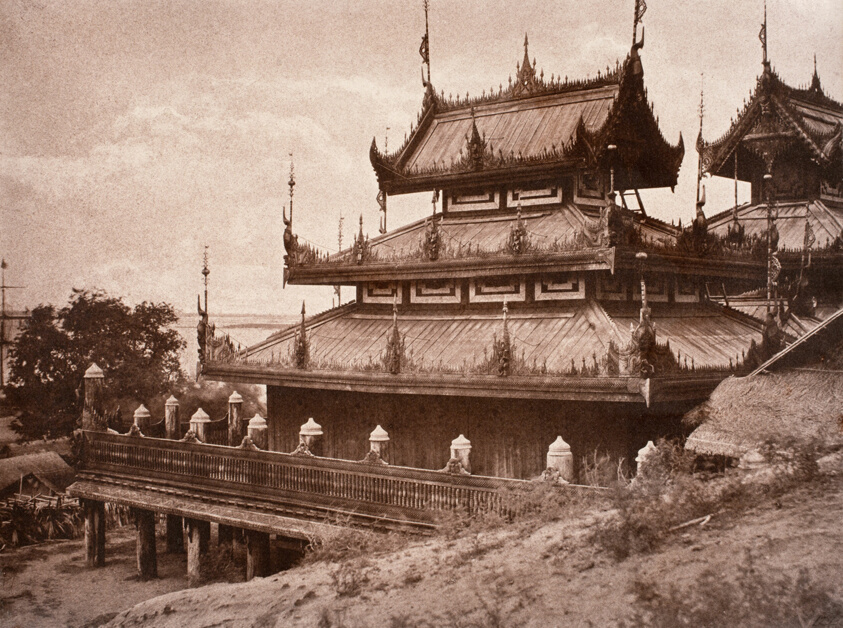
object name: Photograph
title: No. 8. Ye-nan-gyoung [Yenangyaung]. Kyoung.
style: 19th century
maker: Linnaeus Tripe (English, 1822–1902)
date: 1855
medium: Salted paper print, from the album "Views of Burma" (1856)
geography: England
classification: photograph; photography